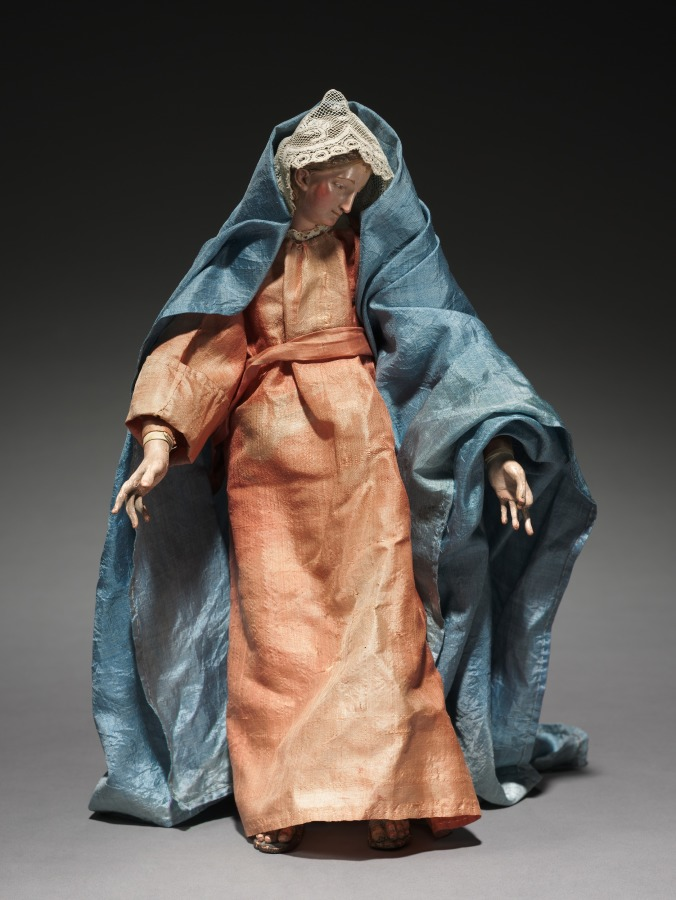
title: Figure from a Crèche: Virgin Mary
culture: Italy, Naples, late 18th-early 19th century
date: 1780–1830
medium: painted wood and terracotta with various textiles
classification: Sculpture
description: The practice of creating scenes of the Nativity for the home dates from the early 1700s in Italy, where people began to set up doll-like figures of about a foot or less in height. The custom was particularly popular in Naples around 1800, where crèche scenes (crèche means cradle, or crib) included many figures, whose heads and hands of painted terracotta, stuffed cloth bodies, and clothing adapted from contemporary local costumes gave them an amazingly realistic character. Representations of the birth of Jesus can be traced to the first few centuries of Christianity. Both living creatures and sculptural depictions of them were used from early times. By the late middle ages it was customary to create life-size figures of wood or stone, naturalistically painted, to represent the characters who participated in the events of Jesus's early life. These sculptures were then arranged in scenes illustrating one or both of the most important of these events, the Adoration of the Shepherds and the Adoration of the Magi-the three kings from the East who came to pay homage to the Christ child. Used in churches, these large figures were especially popular in Italy, Central Europe, Spain, and Portugal.